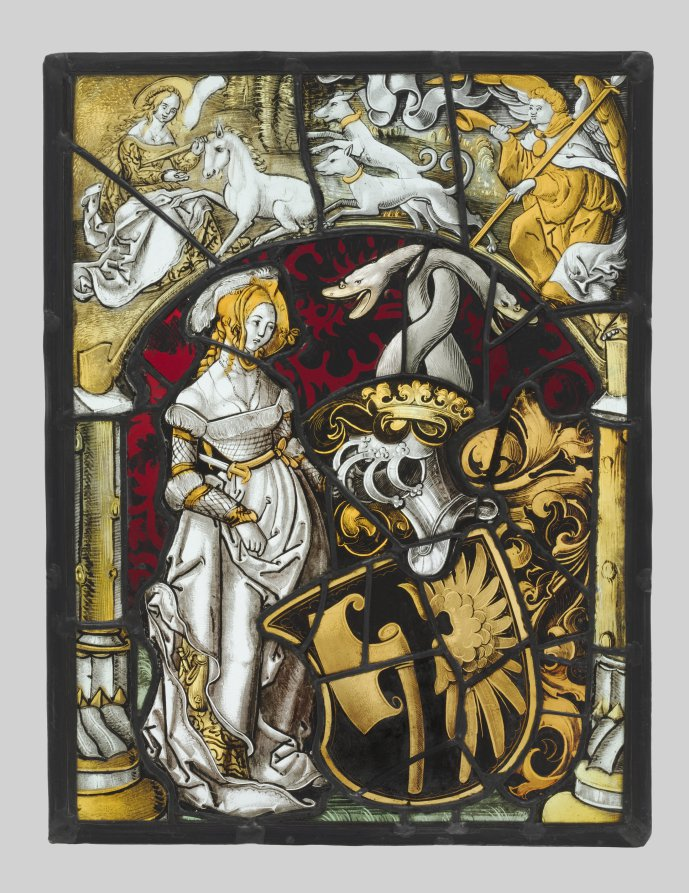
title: Heraldic Panel with Arms of Lichtenfels and a Unicorn Hunt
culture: Germany or Switzerland, 16th century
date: c. 1515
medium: white glass with silver stain and pot metal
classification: Glass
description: The upper half of this panel shows a unicorn hunt reconfigured to represent the annunciation. Only a virgin could lure a unicorn who is seen here grasping the horn of the mythical beast; not far behind are the hunter and hounds. The Virgin here is the Virgin Mary and arriving to the scene is the angel Gabriel dressed as a hunter.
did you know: The red glass is actually layered over clear glass. Otherwise, it would be too dark to see through.